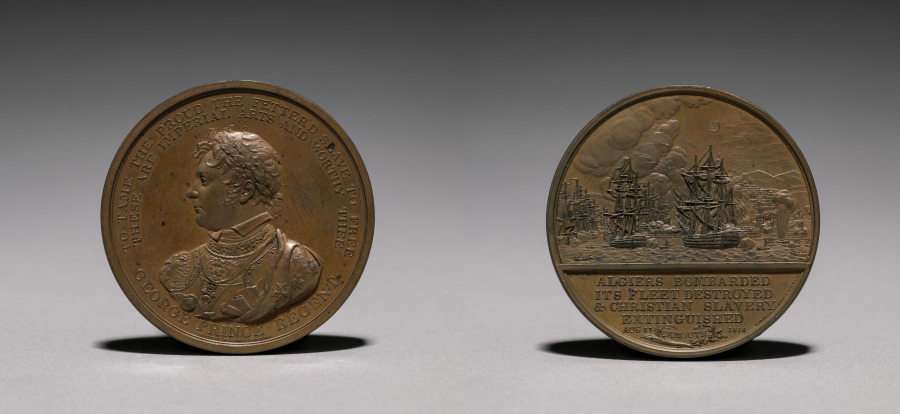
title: Portrait Medal of George, Prince Regent from The Pavilion Collection Series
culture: England, 18th century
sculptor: Thomas Wyon Jr. (British, 1792–1817)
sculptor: Thomas Wyon Sr. (British, d. 1830)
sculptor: Rundell, Bridge and Rundell (British, 1797–1834)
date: 1816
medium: bronze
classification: Metalwork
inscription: To tame the proud the fetter'd slave to free.